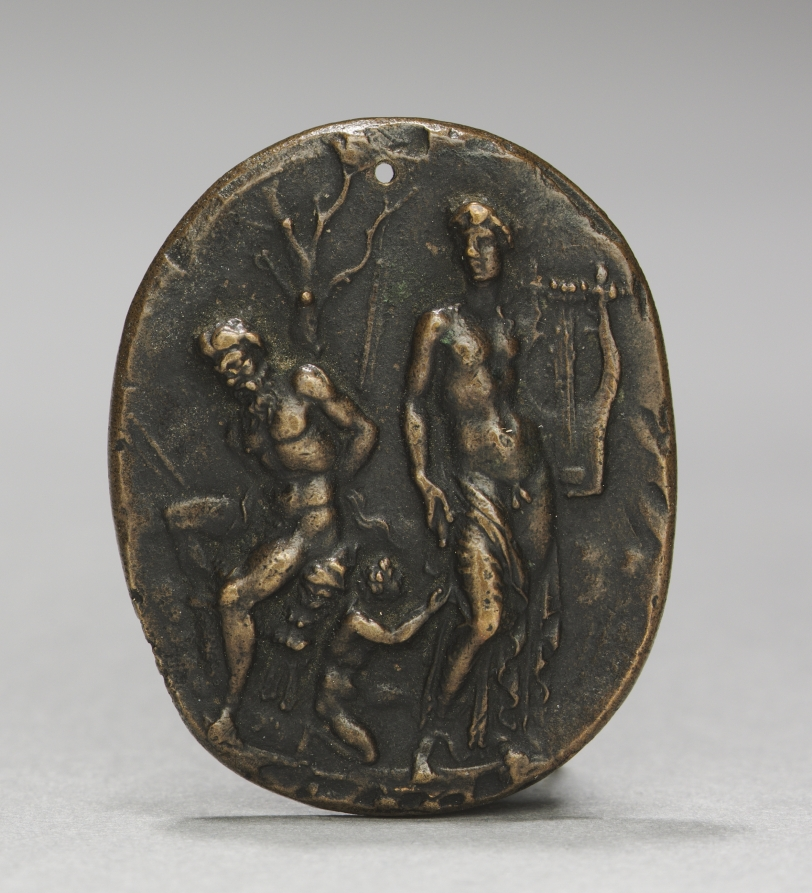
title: Apollo and Marsyas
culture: Italy, 15th century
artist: Cristoforo di Geremia (Italian, active 1456–76)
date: c. 1468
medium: bronze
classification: Sculpture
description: This plaquette is based on an important 1st-century gem attributed to Diskourides that passed into the Medici collection in the 1400s. The antique carnelian stone was so popular that the design was copied in numerous variations and media. In Ovid's Metamorphoses, Marsyas challenged Apollo to a music contest: his flute versus the god's lyre. As punishment for Marsyas's hubris, Apollo bound him to a tree and had his skin flayed. In the middle of the composition is the diminutive Olympus, Marsyas's student, begging Apollo for mercy. While the exact function of this plaquette is not clear, the subject had significance for political and noble figures in the Renaissance. The lyre symbolized peace, and thus the victory of Apollo's lyre stood for the triumph of universal harmony. When Pope Paul II Barbo (1417–1471) commissioned a portrait medal in 1468, the reverse included this same image, making the connection between his papacy and the new "Peace of Italy."